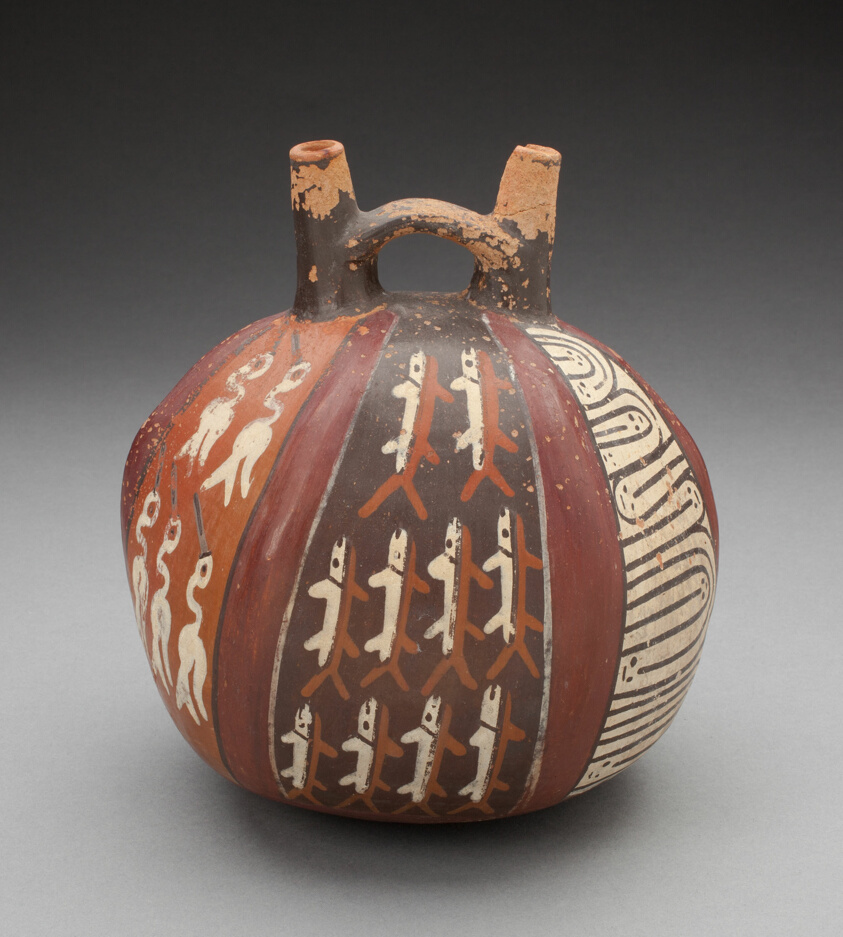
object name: Vessel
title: Double Spout Vessel with Vertical Bands Depicting Fish, Birds, and Geometric Motifs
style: nazca, early intermediate period, Pre-Columbian, americas, Arts of the Americas, andean, andes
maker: Nazca; South coast, Peru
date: 180 BCE–500 CE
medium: Ceramic and pigment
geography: Nazca Valley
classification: earthenware; art of the americas; ceramics; vessel